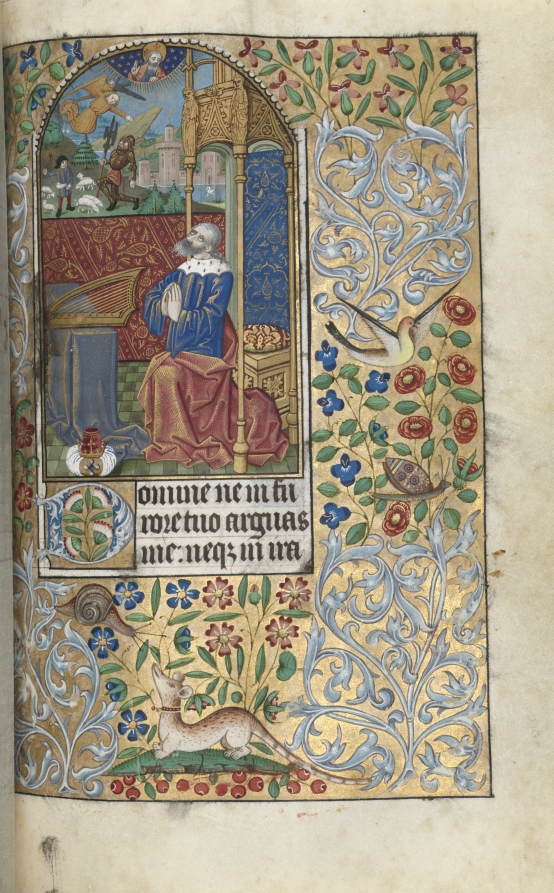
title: Book of Hours (Use of Rouen): fol. 80r, Opening Penitential Psalms, David Penitent, in the Distance David Slaying Goliath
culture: France, Rouen, 15th century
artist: Master of the Geneva Latini (French, active Rouen, 1460–80)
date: c. 1470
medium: ink, tempera, and gold on vellum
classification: Bound Volume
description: In the late 1400s and early 1500s Rouen was an established and important center of book production. The city’s cathedral had a wealthy chapter that spent large sums of money to commission books and to maintain its extensive library. The stationers and booksellers would have likely been concentrated in or near the cathedral precinct. This artist, named after a manuscript now in Geneva, was Rouen’s principal illuminator during the second half of the 1400s.